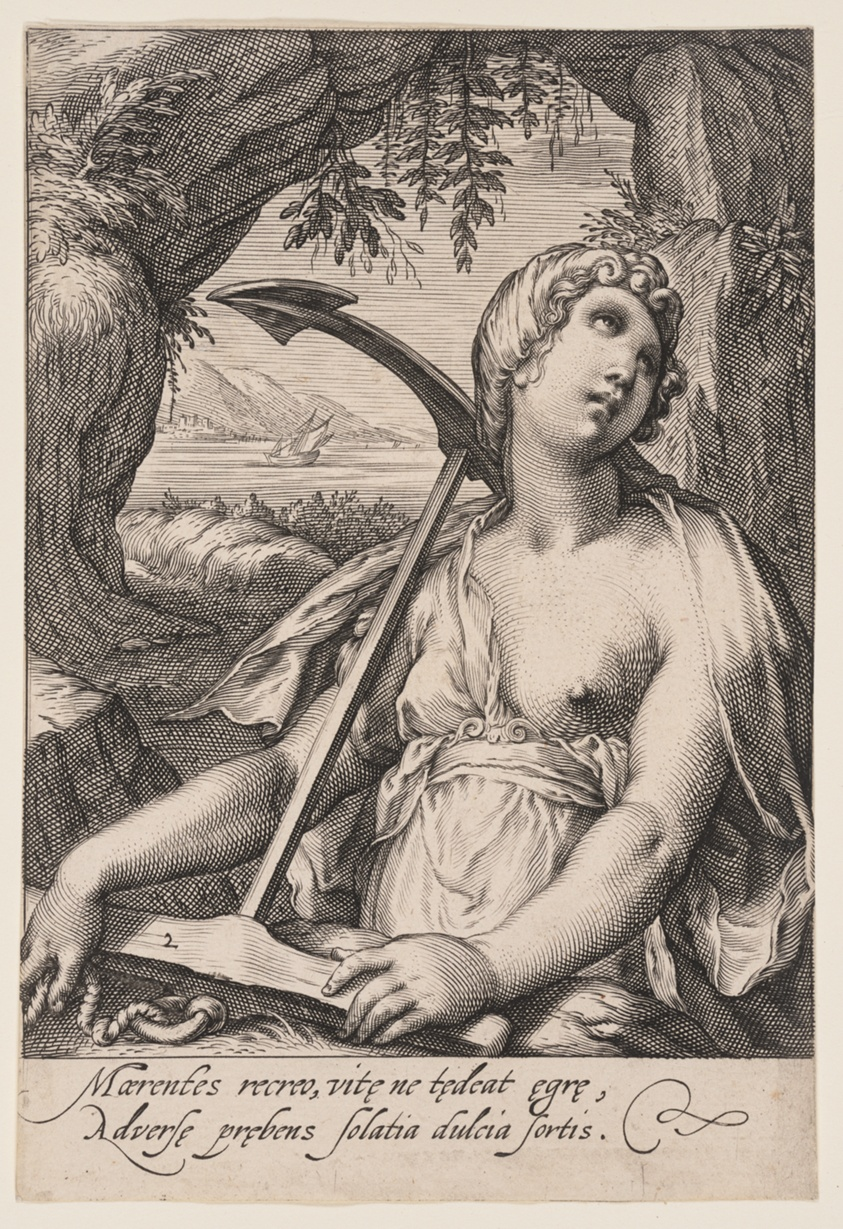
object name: Print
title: Hope, from The Seven Virtues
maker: Jacob Matham (Dutch, 1571–1631); after Hendrick Goltzius (Dutch, 1558–1617)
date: 1597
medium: Engraving on paper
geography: Netherlands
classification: engraving; paper; print; prints and drawing